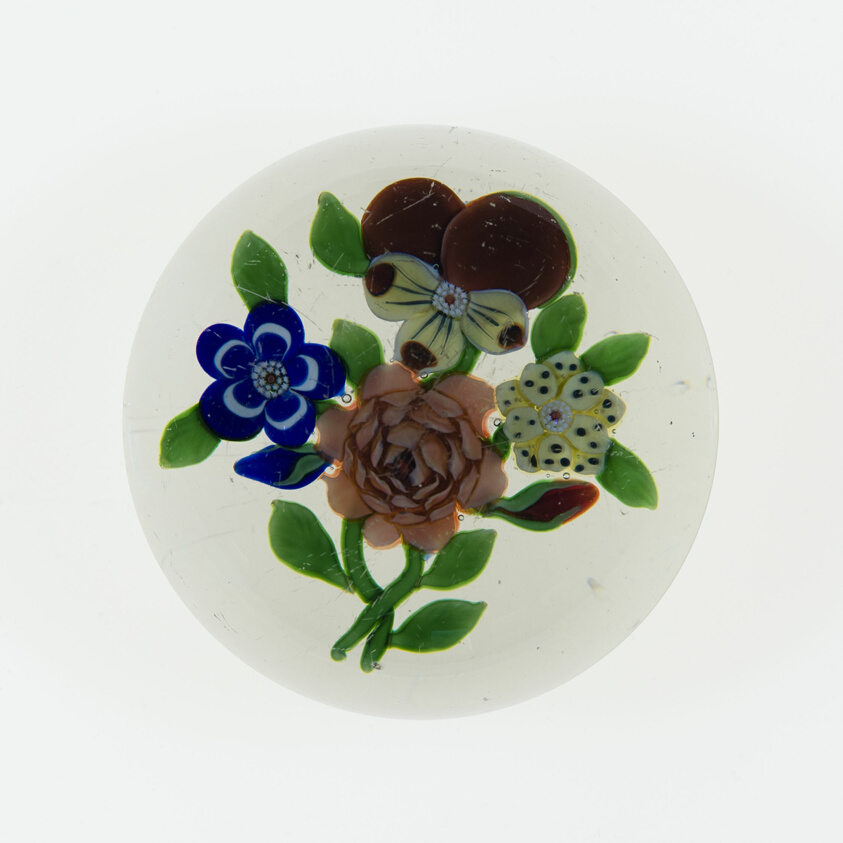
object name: Glass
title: Paperweight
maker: Baccarat Glassworks (Cristalleries de Baccarat); Lorraine, France, founded 1764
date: c. 1848–55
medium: Glass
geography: Lunéville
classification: paperweight; lampwork; european decorative arts; glass